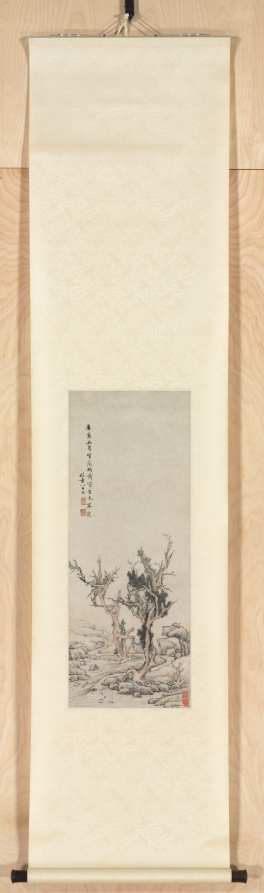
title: Old Trees by a Wintry Brook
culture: China, Ming dynasty (1368–1644)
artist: Wen Zhengming (Chinese, 1470–1559)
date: 1551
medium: hanging scroll, ink and light color on paper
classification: Painting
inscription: 辛亥五月望徵明戲寫古木寒泉 時年八十二 [印] 徵明; 停雲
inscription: 2 additional seals of Mou Yueqi 繆曰芑 (18th century).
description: Wen Zhengming was one of the most celebrated calligraphers and painters during the Ming dynasty (1368–1644). His inscription, gracefully written in small characters on the upper left corner, reveals Wen’s emotional mood at that moment of creation. "In the fifteenth day of the fifth month, the year of xinhai [1551], [I], Zhengming, playfully write this Old Trees by a Wintry Brook at eighty-two [sui]." How should we understand a wintery landscape painted in the middle of spring? Was it simply inspired by a surprisingly late spring snow? Or can it be that the “wintery” brook reflects the octogenarian’s feelings about aging and his inevitable, approaching mortality? The junipers’ gnarled forms are a poignant symbol of aging and suffering, yet the ink-dot leaves on some branches suggest that the trees are still alive, awaiting the warmth of spring.